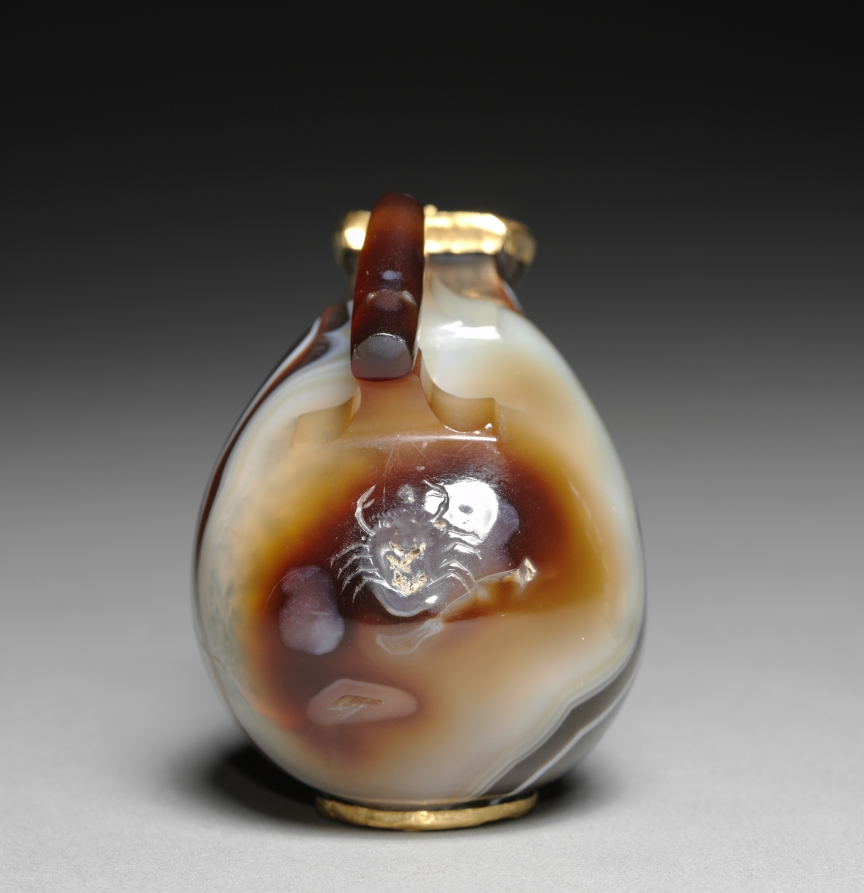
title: Askos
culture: Greece, Ptolemaic Dynasty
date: 200–1 BCE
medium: agate and gold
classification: Cosmetic Objects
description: This miniature vessel was carved from a single piece of banded agate, polished to a shine, and embellished with a gold lid and gold details on the base. Inside the ring of gold at the base is a trio of gold papyrus stalks, a likely reference to Egypt. In shape, it resembles an ancient wineskin, or askos, though its small size suggests use for luxury perfumes or oils. A tiny crab, likely once inlaid with a precious material, has been carved behind the handle.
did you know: The knob on the lid connects to a hidden disk to control the flow of liquid.